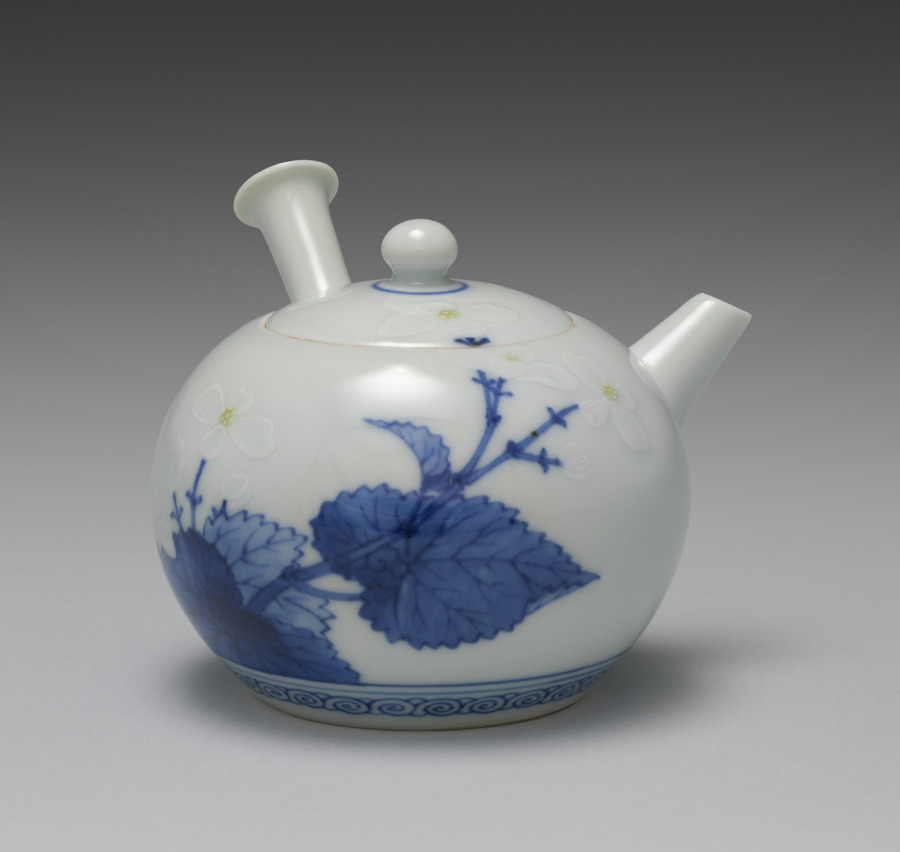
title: Teapot with Begonias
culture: Japan, Meiji period (1868–1912)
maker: Seifū Yohei III (Japanese, 1851–1914)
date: 1897–1914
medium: Porcelain with underglaze and overglaze colors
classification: Ceramic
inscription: 清風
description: This teapot has complex surface treatment: a design of begonias in modulated underglaze blue for the leaves and stems as well as thick overglaze white with incised lines to define the petals, plus small areas of underglaze yellow at their low-relief centers. A band of underglaze blue gives further definition to the lid’s handle, and the area just above the base has a double band of blue above a row of snail-shell curls. Unlike many other teapots, which have marks on their bases, this one has “Seifu” incised into one of its sides in relatively large characters. It is the side that would face the host if the teapot were held by the handle with the right hand, which would be the expectation.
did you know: This teapot with begonias combines underglaze blue with subtle use of yellow and white enamels.